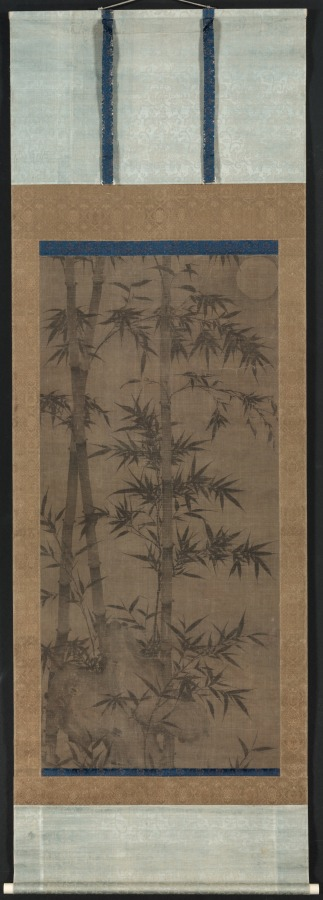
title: Bamboo in Four Seasons: Spring and Autumn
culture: China, Yuan dynasty (1271-1368)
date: 1279–1368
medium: hanging scroll, ink on silk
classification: Painting